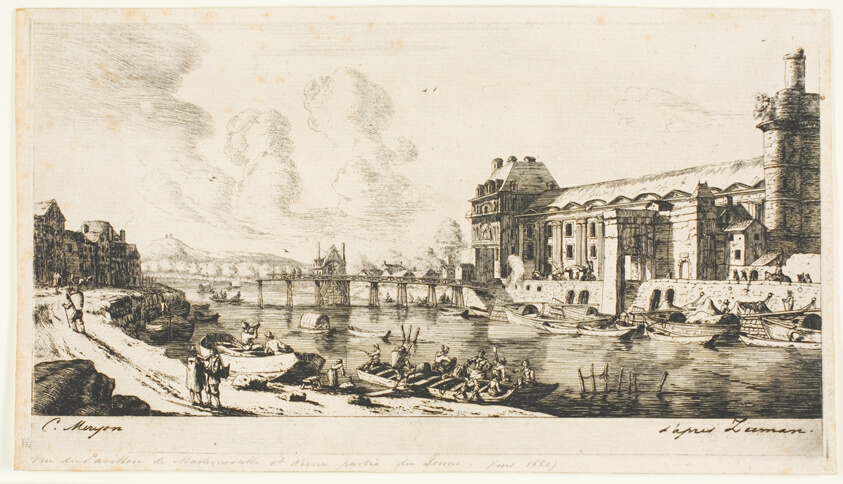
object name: Print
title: The 'Pavillon de Mademoiselle' and Part of the Louvre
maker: Charles Meryon (French, 1821-1868); after Reinier Nooms (Dutch, c. 1623-c. 1664)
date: 1849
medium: Etching, drypoint and roulette on cream laid paper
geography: France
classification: etching; print; prints and drawing